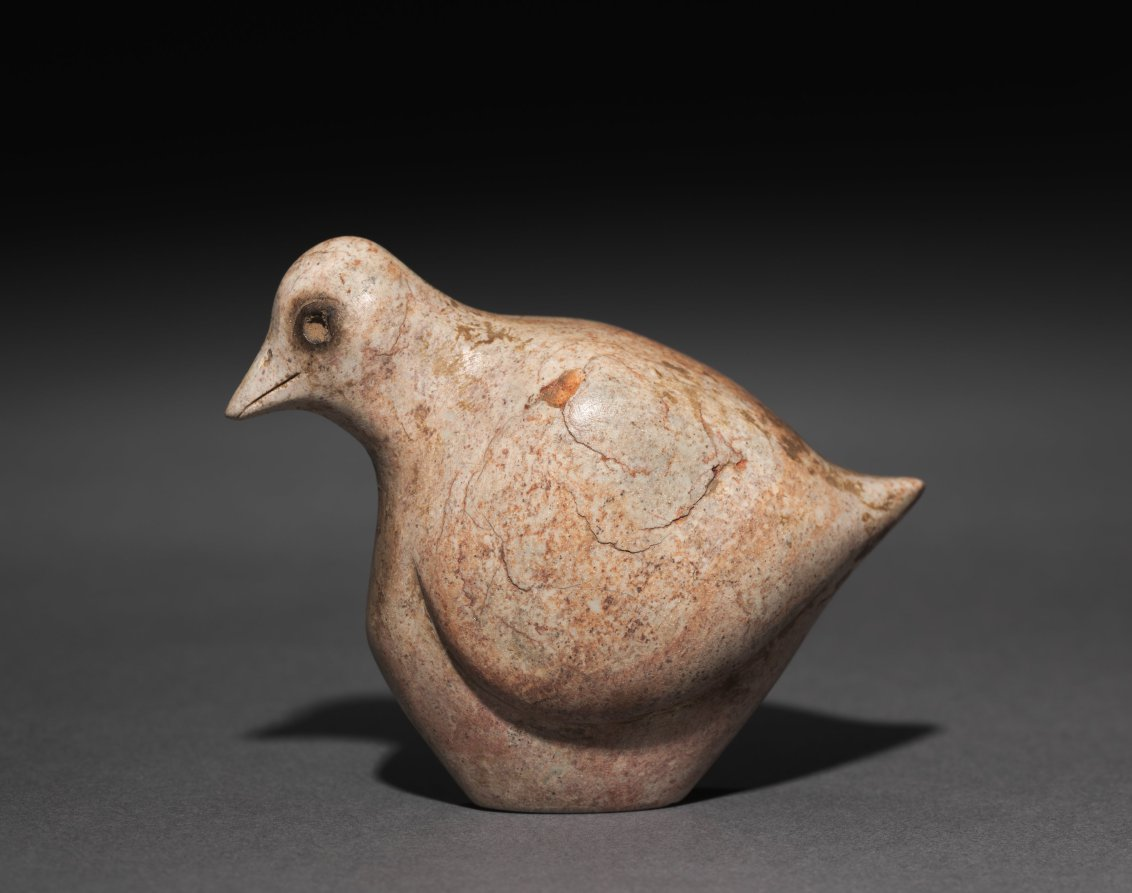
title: Nesting Quail Stamp Seal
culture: Iran, Lake Van region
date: 4000–3000 BCE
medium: dickite stone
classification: Sculpture